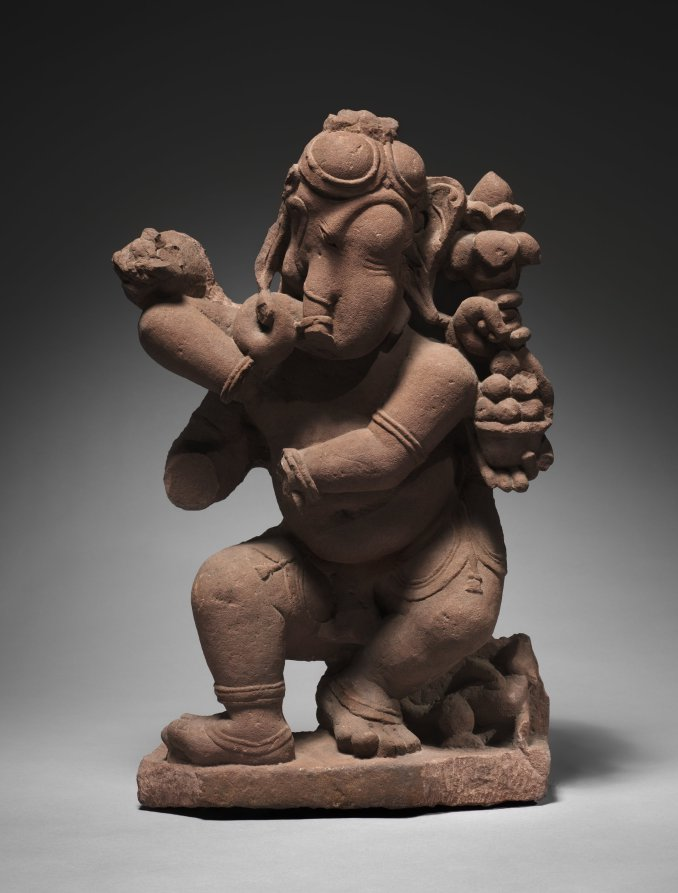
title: Dancing Ganesha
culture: Central India, Madhya Pradesh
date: c. 1000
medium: sandstone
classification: Sculpture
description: The name Ganesha means "lord (isha) of the demonic dwarfs (gana)," part of Shiva's entourage. They dance and imitate Shiva in humorous ways that inspire his followers' affection. In this sculpture Ganesha's dance mimics the dance of Shiva. Ganesha has six arms instead of four, and he holds a bowl of sweet cakes and a radish instead of a tongue of flame.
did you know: Ganesha's mount is the rat, which evokes full granaries and the prosperity and abundance that they imply.